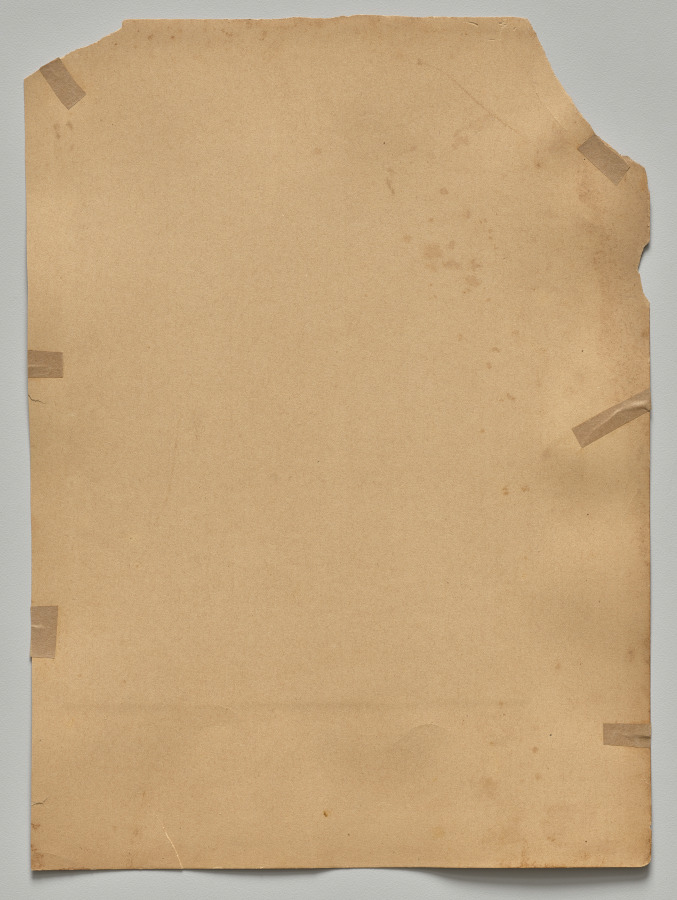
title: Council of Regency, Gwalior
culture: India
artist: Raja Deen Dayal (Indian, 1844–1905)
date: c. 1882–87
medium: albumen print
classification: Photograph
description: These photographs are part of an album, now disassembled, of around 105 photographs taken in India between 1885 and summer 1887 that provide glimpses into the lives of the British colonial elite and royal and upper-class Indians. The museum holds another group of 37 pictures from this album (2016.266), which was probably commissioned by a British civil servant visiting or working in India around 1888 as a personal souvenir of his experiences there.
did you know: Raja Deen Dayal is regarded now, and was considered during his lifetime, to be India’s most important 19th-century photographer.